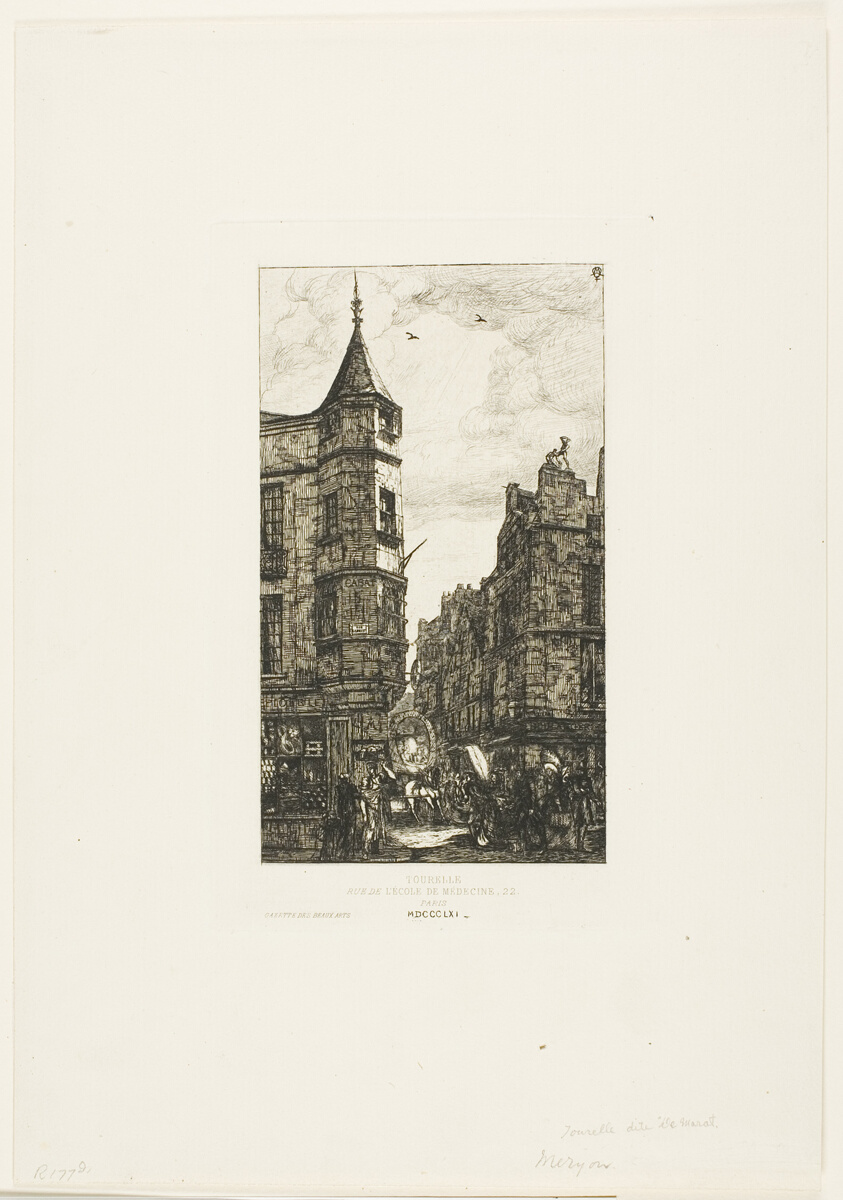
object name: Print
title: House with a Turret, No 22, rue de l'Ecole de Médecine, Paris (called the Turret of Marat)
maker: Charles Meryon (French, 1821-1868); published by Gazette des Beaux-Arts (French,1859-present)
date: 1861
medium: Etching on ivory laid paper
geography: France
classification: etching; print; prints and drawing